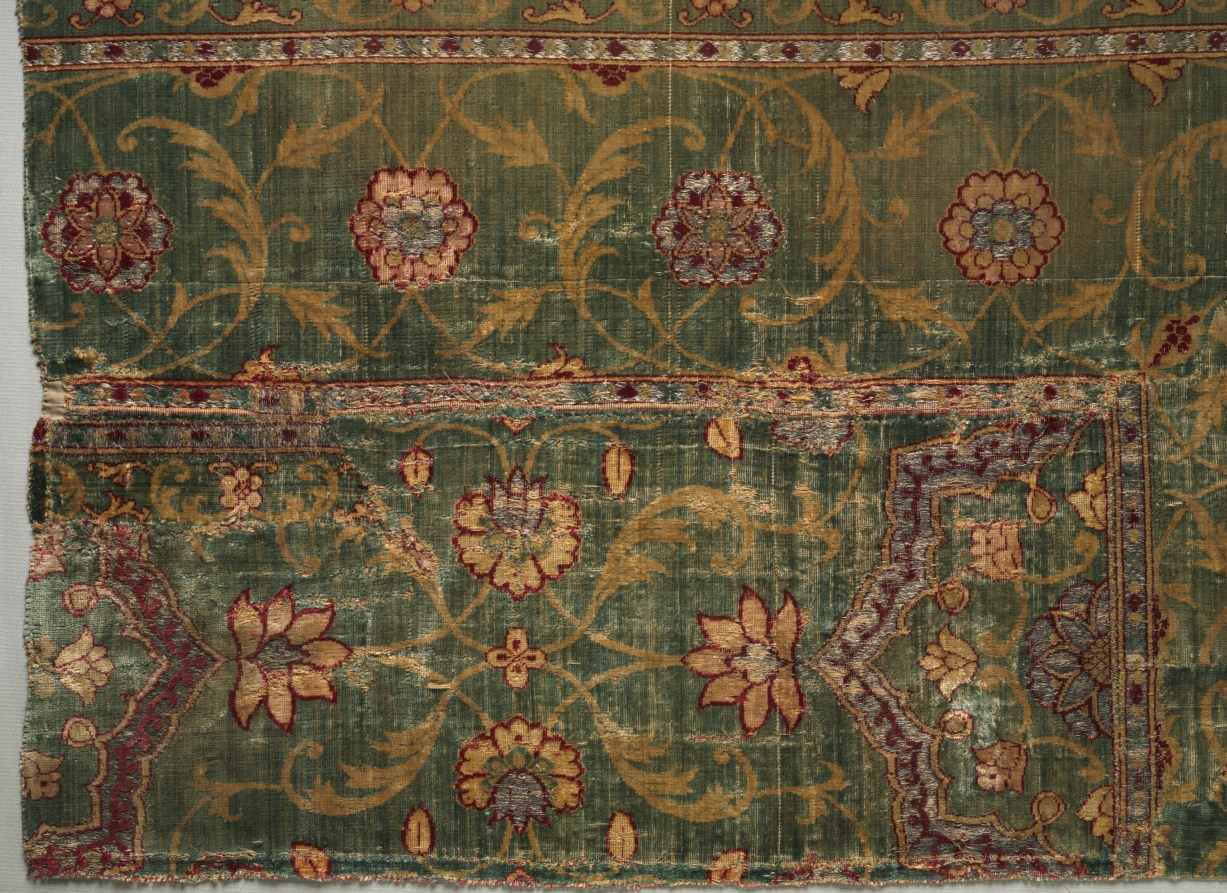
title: Fragment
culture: India, 17th century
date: 1600s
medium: velvet (brocaded); silk and metal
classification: Velvet